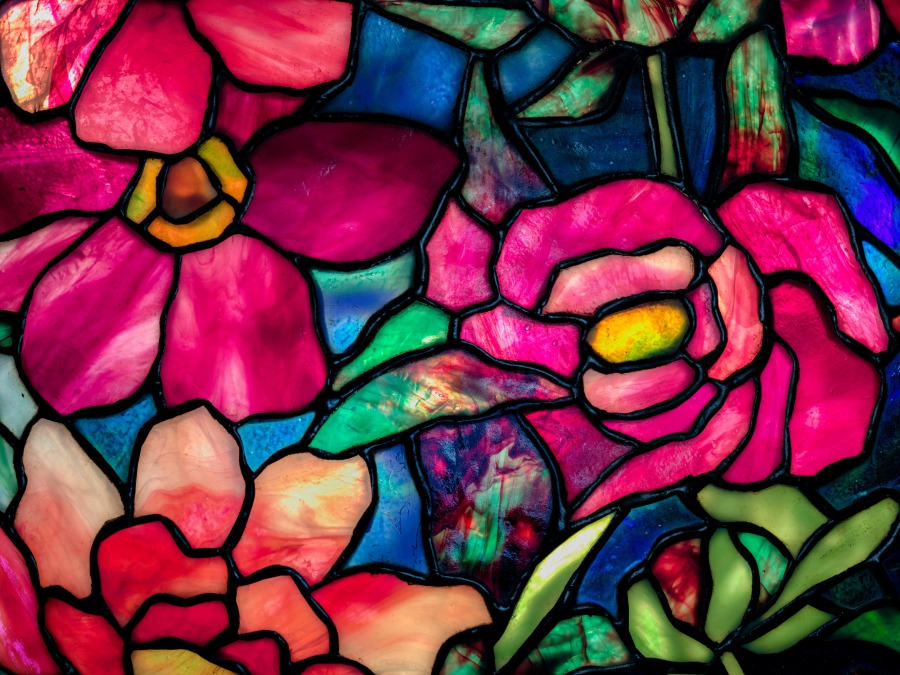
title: Peony Floor Lamp with a Bamboo Base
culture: America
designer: probably by Clara Wolcott Driscoll (American, 1861–1944)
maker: Tiffany Studios (United States, New York, 1902–32)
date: c. 1905–10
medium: Leaded glass, bronze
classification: Furniture and woodwork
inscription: TIFFANY STUDIOS NEW YORK 505-17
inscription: TIFFANY STUDIOS/NEW YORK/10933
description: Tiffany and his designers brought the garden inside with their floral lamp designs. They also re-created the ever-changing qualities of natural light using the light and dark tonal effects of the glass when illuminated with electric lamps. This night and day version of the Peony shade could be rotated during the day to increase or decrease the amount of light it cast—intense reds for a darker glow at night, lighter pinks during the day.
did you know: The shade on this floor lamp can be rotated with the touch of a finger to provide brighter or dimmer light.